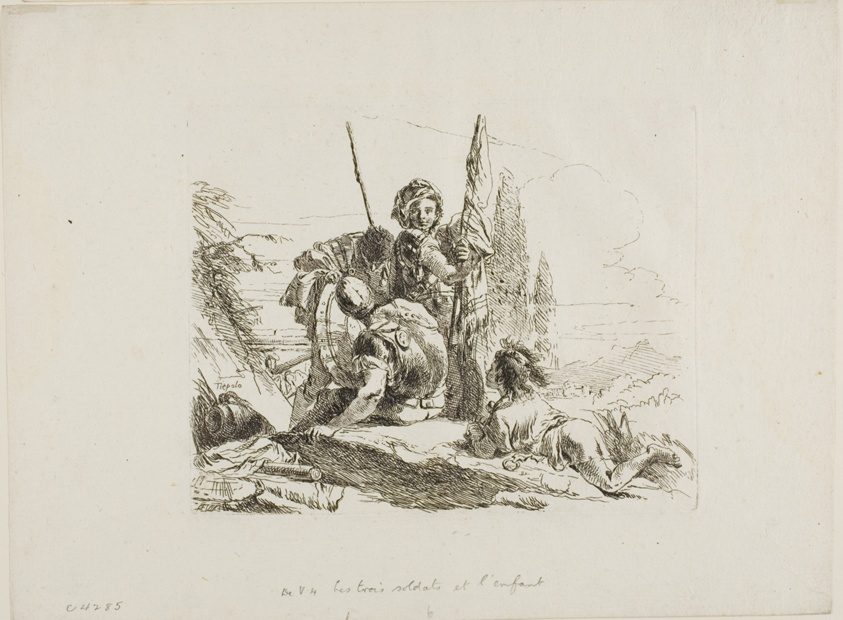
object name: Print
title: Three Soldiers and a Boy, from Capricci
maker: Giovanni Battista Tiepolo (Italian, 1696–1770)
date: c. 1740, published 1785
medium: Etching on paper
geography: Italy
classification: etching; print; prints and drawing